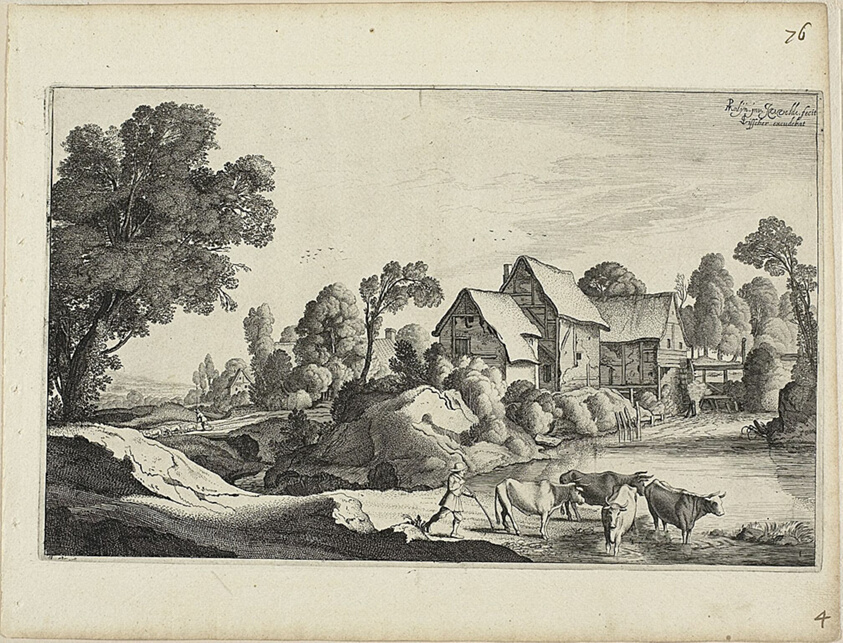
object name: Print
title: Herd of Cattle at a Ford Near a Watermill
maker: Jan van de Velde II (Dutch, c. 1593-1641); after Pieter de Molijn (Dutch, 1595-1661)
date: 1646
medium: Engraving on cream laid paper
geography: Netherlands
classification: print; prints and drawing